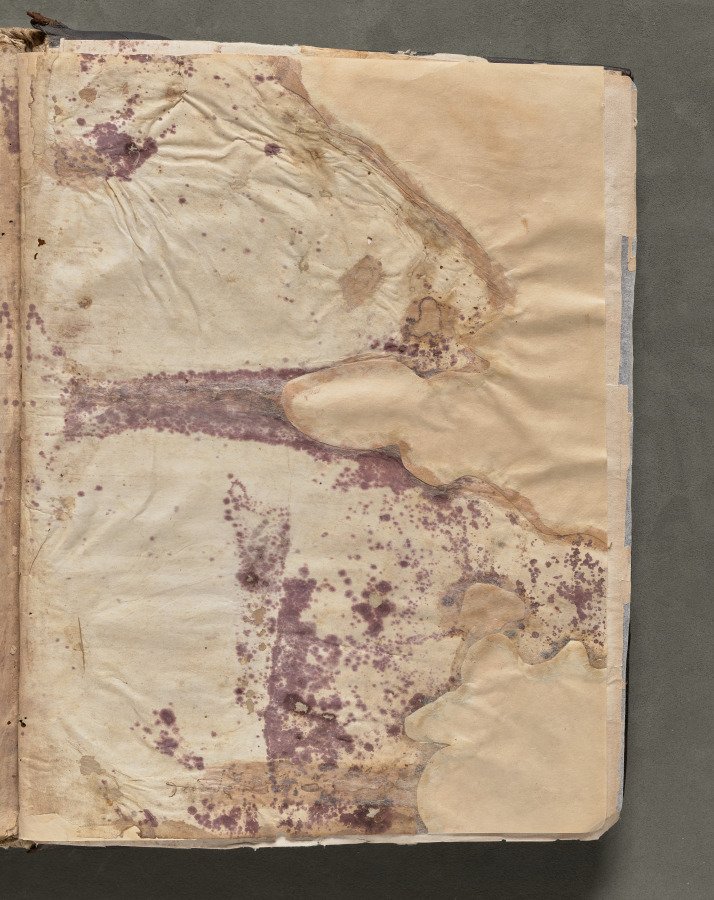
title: Text, folio 427 (recto), from a Gospel Book with Commentaries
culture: Byzantium, Constantinople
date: c. 1000–1100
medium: ink, tempera, and gold on vellum; leather binding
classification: Bound Volume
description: Each of the four gospels in this book opens on a page with brilliantly illuminated borders depicting the author of the text as well as birds—principally peacocks, symbols of the immortality of the soul—and fountains, representing the fountain of life and the salvation of the soul. This volume consists of 428 leaves with texts in Greek. Its level of sophistication suggests that it was probably written and decorated in a monastery in Constantinople.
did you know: Gospel books were carried in procession through Byzantine churches.